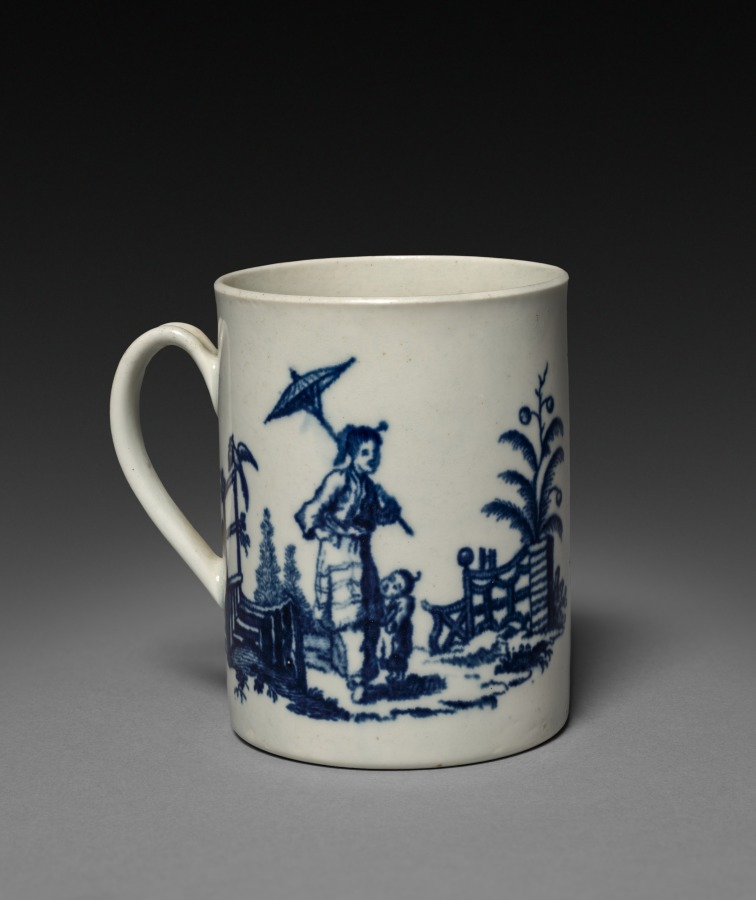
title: Chinoiserie Mug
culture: England, Worcester, 18th century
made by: Worcester Porcelain Factory (British, established 1751)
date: c. 1760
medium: soft-paste porcelain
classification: Ceramic